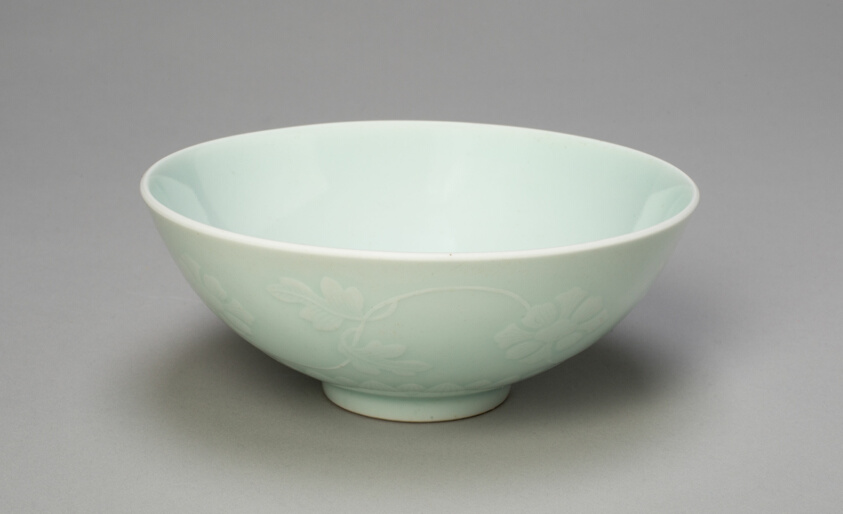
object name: Vessel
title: Bowl with Blossoms and Radiating Petals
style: Chinese (culture or style)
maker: China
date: Qing dynasty (1644–1911), Yongzheng period (1723–1735)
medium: Porcelain with underglaze molded decoration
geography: China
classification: bowl; porcelain; dish (vessel); asian art; ceramics; vessel